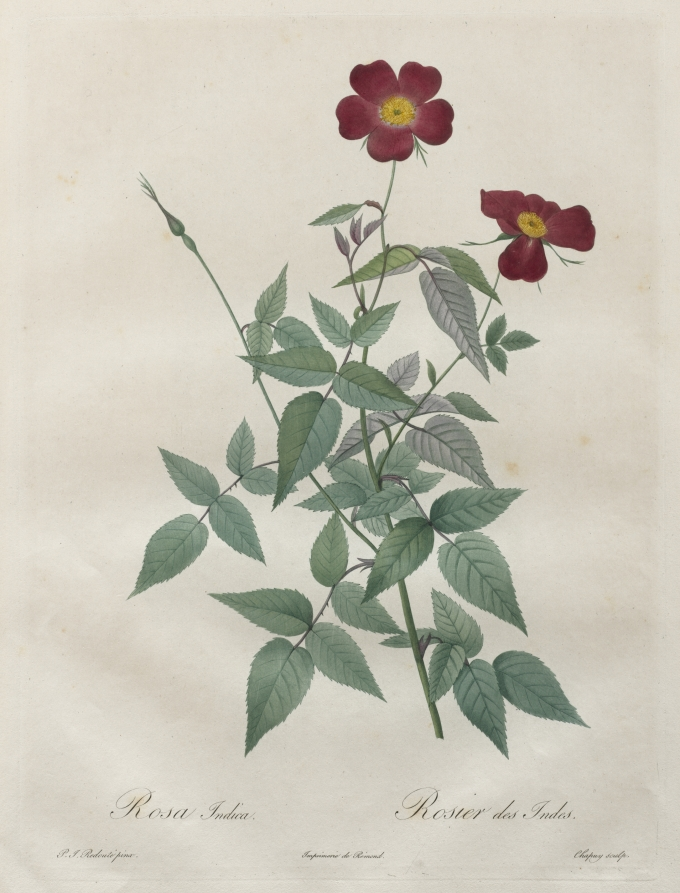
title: Les Roses: Rosa indica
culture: France, 19th century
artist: Henri Joseph Redouté (French, 1766–1853)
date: 1817–1824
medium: stipple and line engraving, with hand coloring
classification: Print